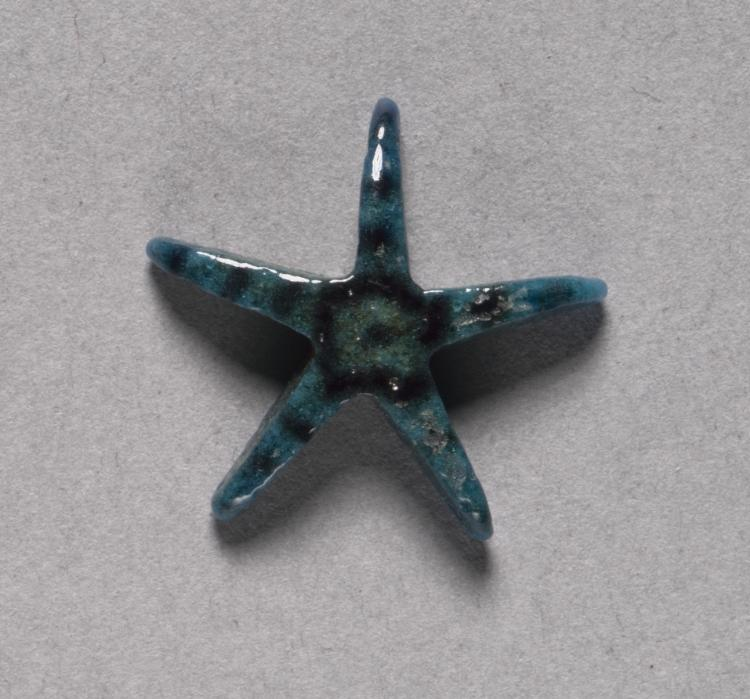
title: Amulet of a Star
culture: Egypt, Middle Kingdom (2040–1648 BCE), Dynasty 12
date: 1980–1801 BCE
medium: deep turquoise green faience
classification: Amulets